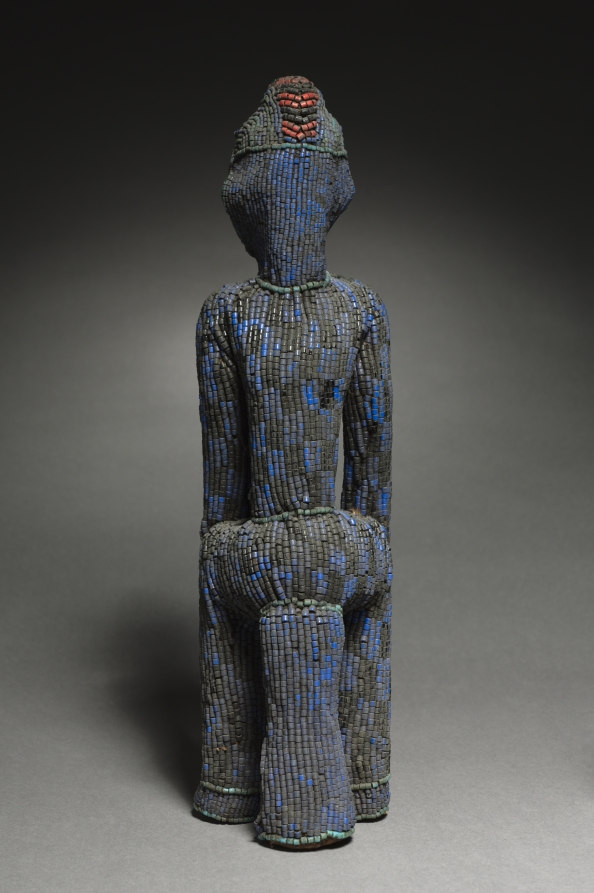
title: Figure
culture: Africa, Central Africa, Cameroon, Grassfields region, unidentified maker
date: 1900s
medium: Wood, glass beads, cloth, thread, and cowrie shells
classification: Sculpture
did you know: The beads on this sculpture were imported, likely from Venice or Bohemia (now called the Czech Republic).